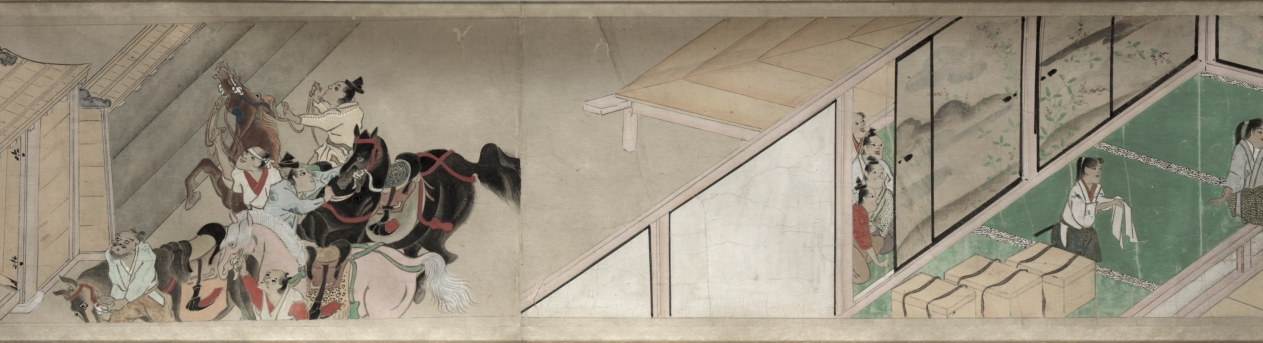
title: The Saltmaker's Story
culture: Japan, Edo period (1615–1868)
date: early 1600s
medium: One of a pair of handscrolls; ink, color, and gold on paper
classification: Painting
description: Once read and copied by girls at New Year’s celebrations and included in dowries, The Saltmaker’s Story is a rags-to-riches tale in which daughters are gifts from the gods. Despite his simple outlook, the main character progresses from humble roots as an associate at Kashima Shrine to the elite status of grandfather of the emperor through the intervention of the Kashima deity. The Saltmaker’s Story is traditionally presented in a set of three scrolls, but the text of this set has been removed by a previous owner, who remounted the illustrations as a pair. The paintings of this one take us from right to left through the second half of the tale.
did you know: This handscroll originally had texts before its paintings, but the texts were removed.